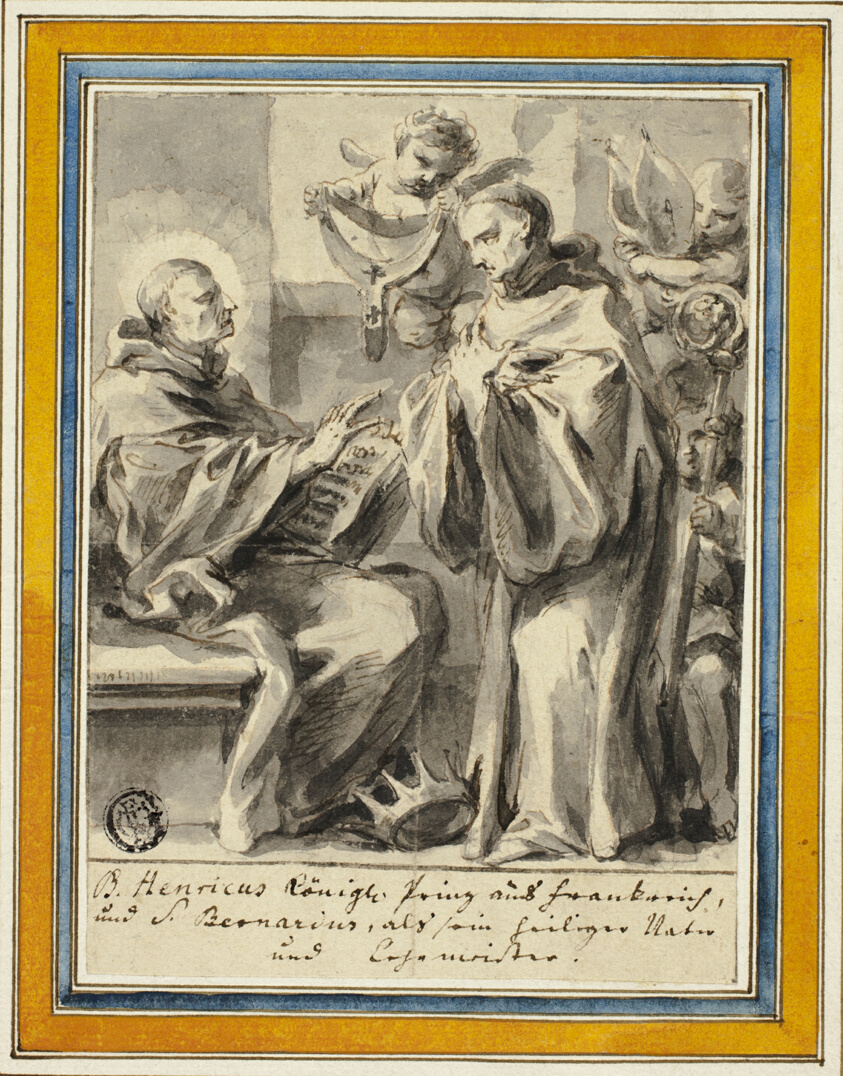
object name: Drawing and Watercolor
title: King Henry of France and Saint Bernard of Clairvaux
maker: Possibly Johann Christoph Lischka (Bohemian, 1650-1712); or Gottfried Bernhard Goetz (German, 1708-1774); or Jonas Umbach the elder (German, 1624-1693)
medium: Pen and black and brown ink, with brush and gray wash, over traces of red chalk, on cream laid paper, laid down on ivory laid paper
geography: Germany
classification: ink or chalk wash; drawings (visual works); prints and drawing